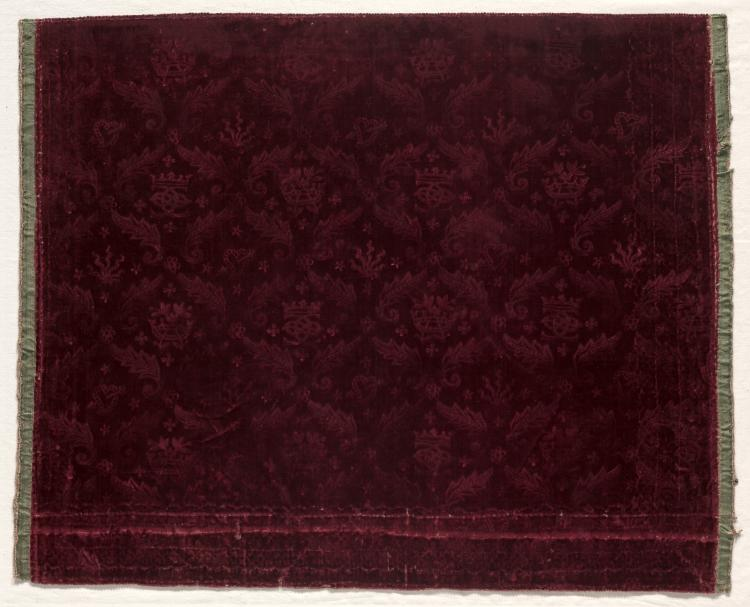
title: Fragment of Stamped Velvet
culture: France or Spain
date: 1600s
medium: stamped velvet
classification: Velvet